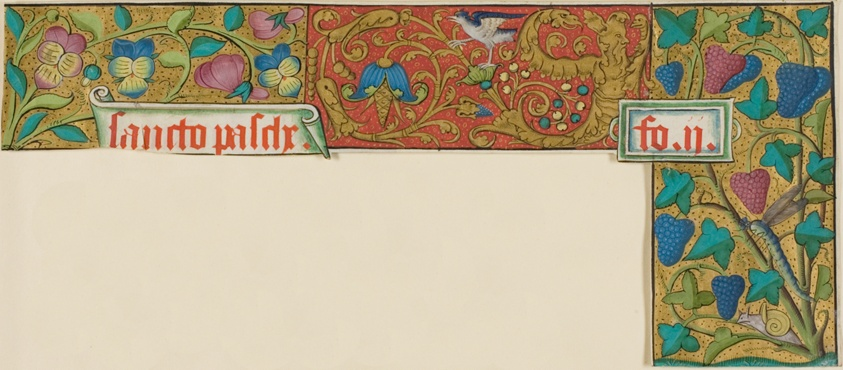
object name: Drawing and Watercolor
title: Illuminated Border with Snail, Insect, Bird, Grotesques and Flowers from a Manuscript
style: medieval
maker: French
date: 15th or early 16th century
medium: Manuscript cutting in tempera and gold leaf, with Latin inscriptions in gothic in red ink, on vellum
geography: France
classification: tempera; manuscript; drawings (visual works); prints and drawing